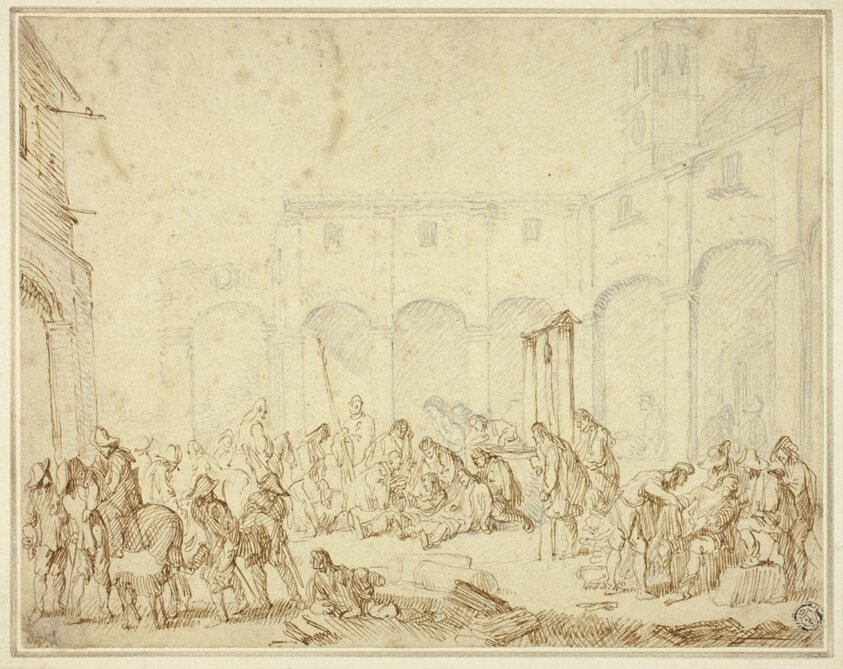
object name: Drawing and Watercolor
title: Wounded Soldiers in a Courtyard on Town Square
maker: Cornelis de Wael (Flemish, 1592-1667)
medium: Graphite and pen and brown ink on tan laid paper, laid down on card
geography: Flanders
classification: pen and ink drawings; drawings (visual works); prints and drawing